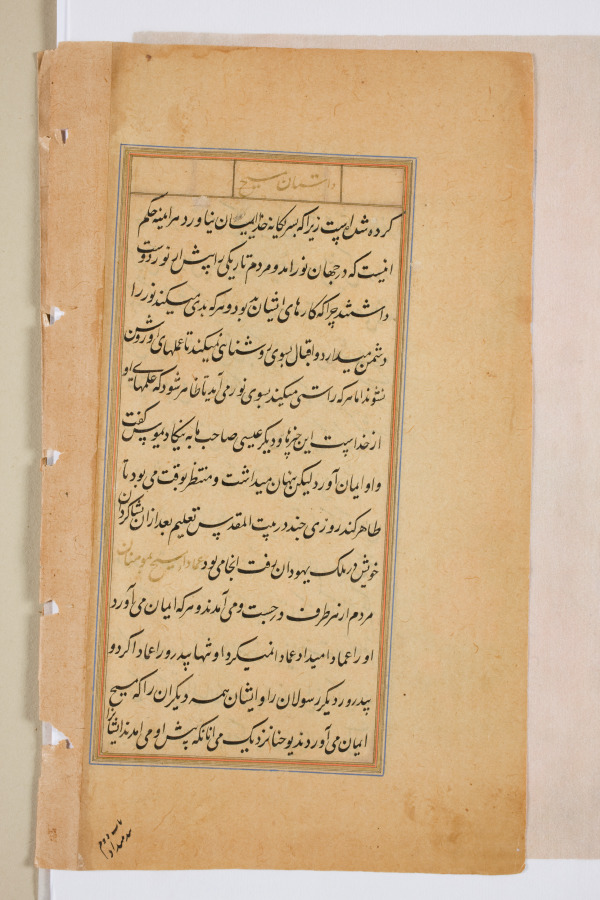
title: Text page from a Mirror of Holiness (Mir’at al-quds) of Father Jerome Xavier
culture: Mughal India, Allahabad, made for Prince Salim (1569–1627)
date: 1602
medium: Ink and gold on paper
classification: Manuscript